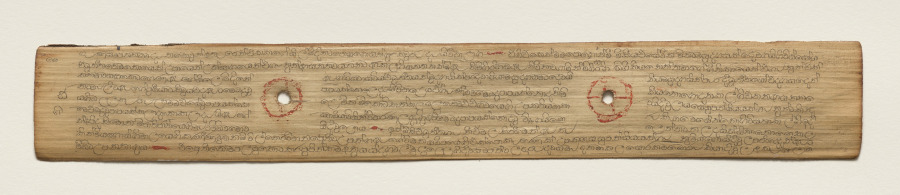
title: Leaf from a Buddhist Manuscript (recto)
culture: Sri Lanka, Singhalese, Late 17th century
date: c. 1700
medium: fiber paper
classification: Manuscript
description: Palm leaf material is still used for manuscripts in Sri Lanka. The palm leaves are prepared first by boiling them, drying them in the sun, and then rubbing them with oils. Scribes then use a metal stylus to incise the text. Then charcoal powder is wiped across the pages, filling in only the inscribed lines.